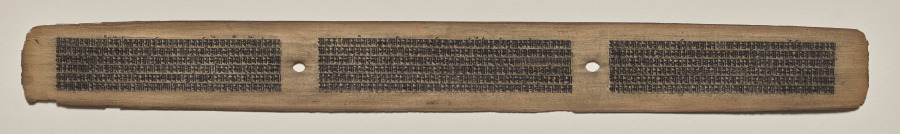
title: Text, Folio 27 (recto), from a Manuscript of the Perfection of Wisdom in Eight Thousand Lines (Ashtasahasrika Prajnaparamita-sutra)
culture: Eastern India, Bihar, Vikramashila Monastery. Painting: Nepal, Kathmandu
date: Sunday, September 14, 1119 (year 239 of the Newar Samvat in the month of Ashvina)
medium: gum tempera and ink on palm leaves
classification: Painting